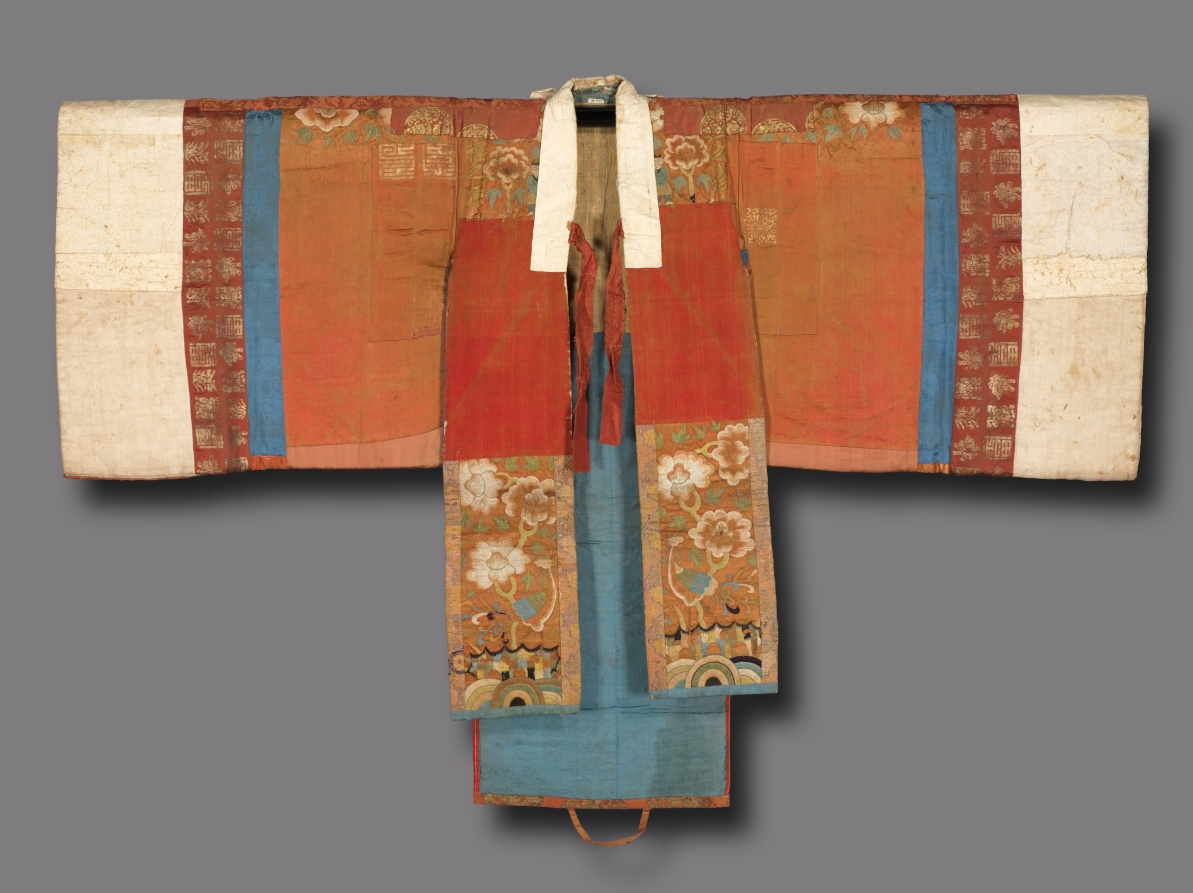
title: Bridal Robe (Hwarot)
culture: Korea, Joseon dynasty (1392–1910)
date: 1700s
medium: Satin weave silk; silk embroidery; paper edging on neck and sleeves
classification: Garment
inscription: [二姓]之合 / [百]福之源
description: This bride's robe is exquisitely embroidered with various symbols of happiness in colorful silk threads. Butterflies stand for marital happiness; the phoenix, numerous offspring; and lotus flowers and white cranes, longevity. Yet, the bridal robe does not attest to the life of luxury. To the contrary, many traces of repairs, trimmings, and patchwork reflect Joseon period women’s commitment to value neo-Confucian aesthetics of frugality and modesty. Substantial repairs and patching reveal that this robe served as an important communal resource to be shared and passed down through several generations. Its collar and sleeves are covered in thick white paper; this paper is replaced with new paper for each bride, while the robe itself was reused for decades.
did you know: This bride's robe was not made for one specific bride, but rather was shared and passed down to many brides.